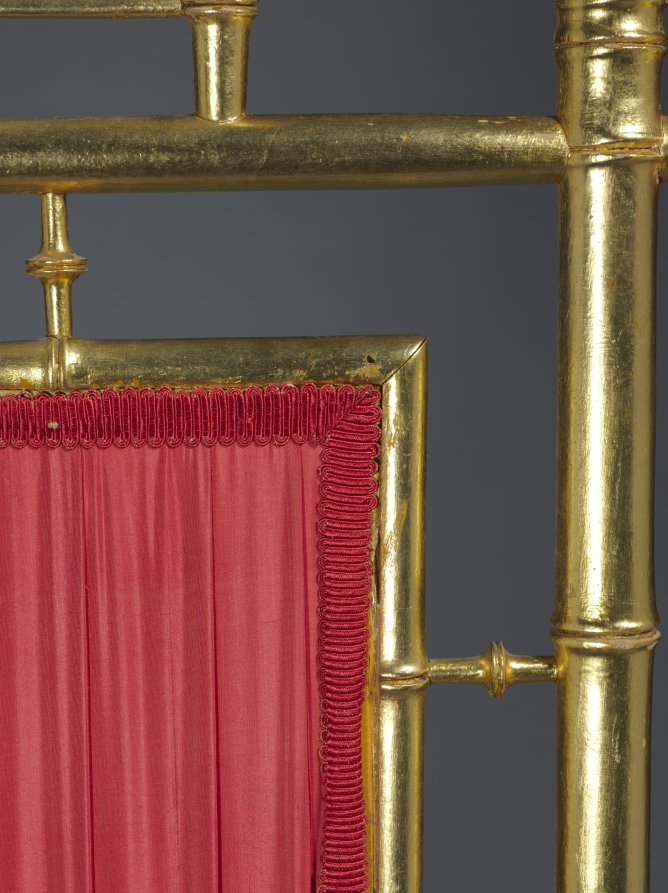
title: Fire Screen with Shell-Matching Game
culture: France, 19th century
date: c. 1870–80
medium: Gilt wood frame with embroidered silk gift cover mounted as a panel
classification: Furniture and woodwork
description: This screen shielded sitters from the heat of a fireplace. The panel incorporates a Japanese cloth gift cover (fukusa), demonstrating the 19th-century fashion in France for Japanese aesthetics. The French frame is carved to resemble bamboo. In Japan, people traditionally draped fukusa over gifts, selecting designs relevant to the occasion. The lids of the hexagonal lacquer game-piece boxes have a crane in clouds and a tortoise in waves, both symbols of longevity. Wedding gift sets often included shell-matching games like the one depicted here. Only the two halves of a specific clamshell can be perfectly matched; game players used the shells’ interior paintings as clues. Games were sometimes painted with episodes from literature, such as the Tale of Genji.